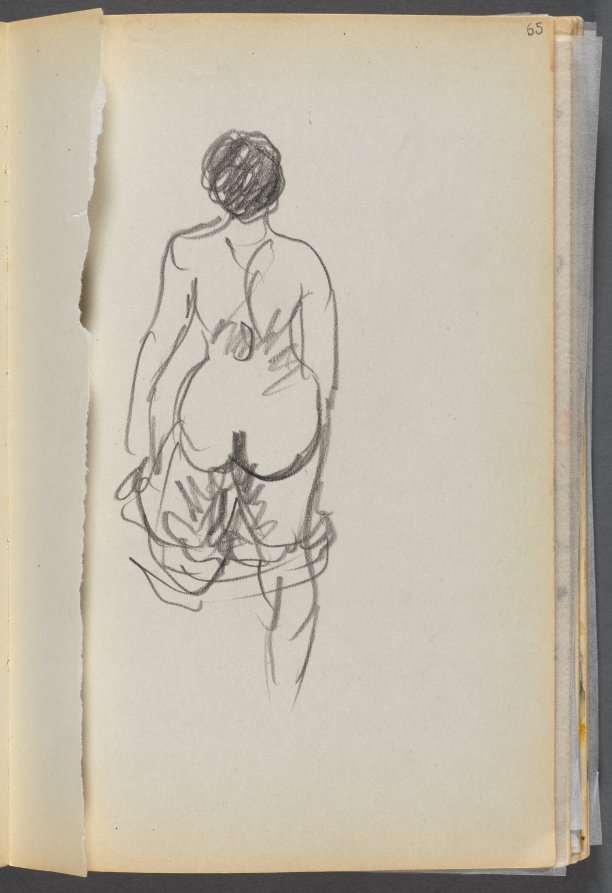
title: Sketchbook- The Granite Shore Hotel, Rockport, page 065: Nude Female seen from behind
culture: America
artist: Maurice Prendergast (American, born Newfoundland [now Canada], 1858–1924)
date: 1905–10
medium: graphite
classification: Bound Volume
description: This sketchbook contains 72 pages of pencil drawings and 9 watercolors of Cape Ann. On the inside of the cover Prendergast wrote the address of the Granite Shore Hotel in Rockport, Massachusetts.